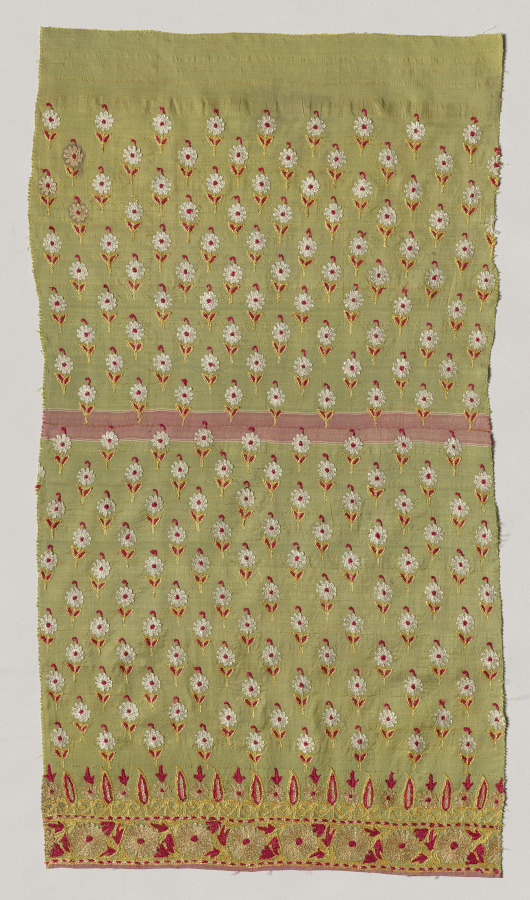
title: Piece of a Skirt (Ghagra)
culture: Western India, Gujarat, Kachchh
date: late 1800s–early 1900s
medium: silk on silk tabby ground, embroidery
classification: Embroidery